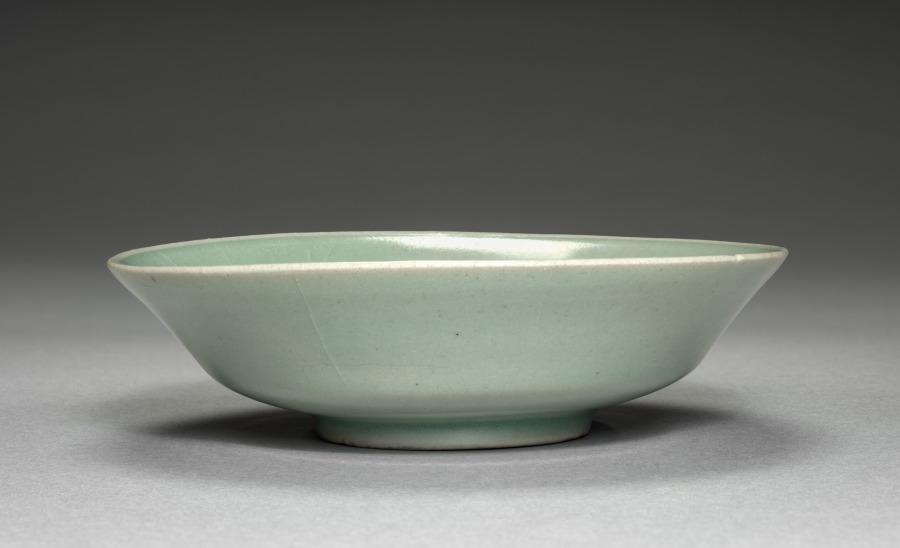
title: Dish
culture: Korea, Goryeo dynasty (918–1392)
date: 1100s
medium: glazed porcelain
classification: Ceramic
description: Celadon wares used for everyday such as this dish were among the most common burial objects in tombs during the Goryeo period (918–1392). Furnishing tombs with an elaborate assemblage of objects was believed to honor and comfort the newly dead. Generally, Goryeo tombs were left untouched until the late 1800s. During the colonial period (1910–45), however, Japanese archaeologists competitively excavated the tombs located in Kaeseong, the former capital of the Goryeo period, and soon became available for Japanese and Western collectors.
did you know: The pale bluish glaze indicates that this dish was created in the 1100s, when the production of celadon reached its technical peak.